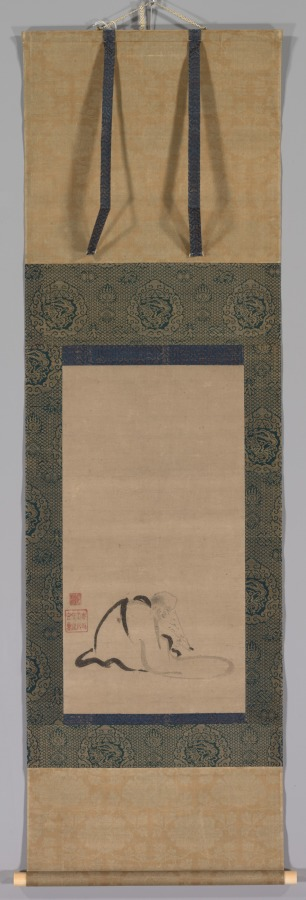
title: Seated Priest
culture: Japan, Momoyama period (1573-1615) to Edo period (1615-1858)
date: late 1500s-1650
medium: hanging scroll; ink on paper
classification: Painting